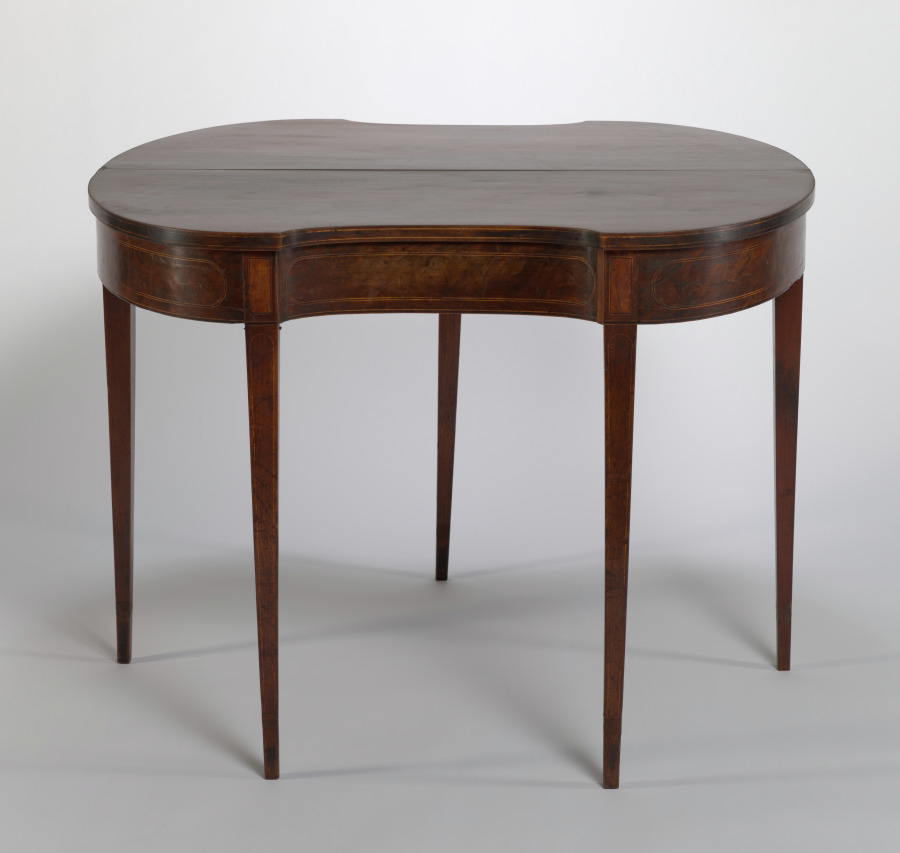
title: Game Table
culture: America, Maryland, Baltimore, early 19th Century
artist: style of George Hepplewhite (American, 1786)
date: c. 1800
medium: mahogany with inlays of various woods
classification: Furniture and woodwork